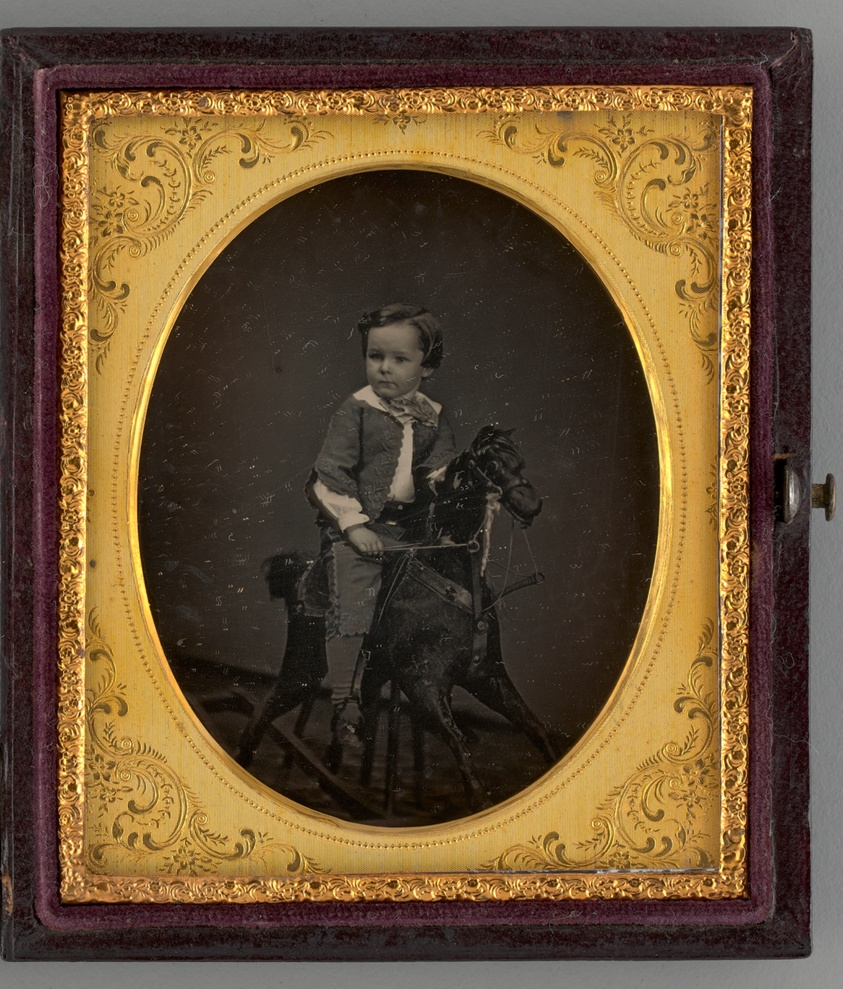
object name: Photograph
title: Untitled (Portrait of a Child on a Rocking Horse)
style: 19th century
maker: Alexander Hesler (American, born Canada, 1823-1895)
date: 1862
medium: Daguerreotype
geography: United States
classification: portrait; photograph; photographic process; photography; portrait; daguerreotype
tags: lundberg collection, toys, portrait, boys, portraits, portraits: child subject